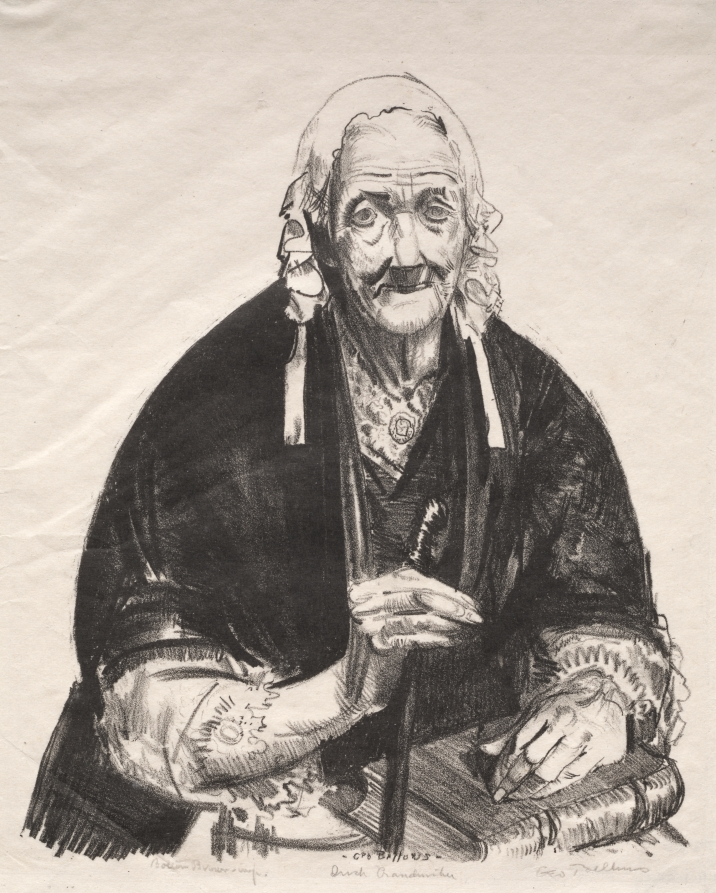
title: Irish Grandmother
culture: America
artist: George Bellows (American, 1882–1925)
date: 1923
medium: lithograph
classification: Print